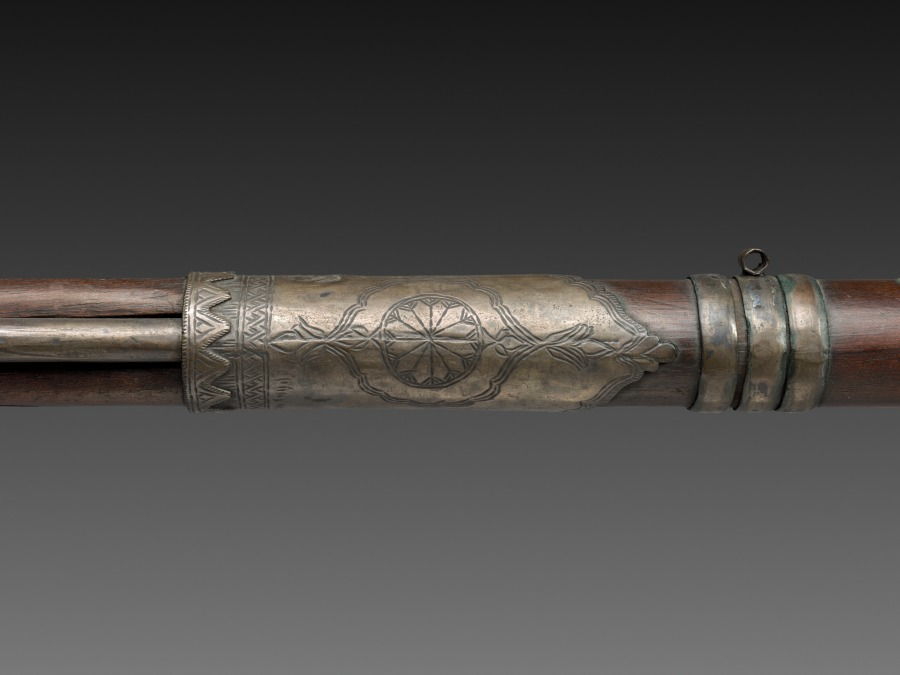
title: Matchlock Musket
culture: Turkey, Ottoman period (1299–1922)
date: c. 1750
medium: Wood, steel, brass, mother-of-pearl inlay, and leather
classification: Arms and Armor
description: Collectively, the Safavid, Mughal, and Ottoman empires are known as the Gunpowder Empires. Particularly from the 1500–1700s, they were among the strongest economic, cultural, and militaristic powers. Each trained and equipped their armies with the latest gunpowder firearms, particularly cannons and muskets. While used in battle, muskets were also used for leisure activities, particularly hunting. The decoration on this musket suggests it was a courtly item, fitted with a leather pad to protect the shooter from the force of the explosion after firing.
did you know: A matchlock musket was loaded from the muzzle end with a scouring stick kept in a sleeve on the underside of the barrel.